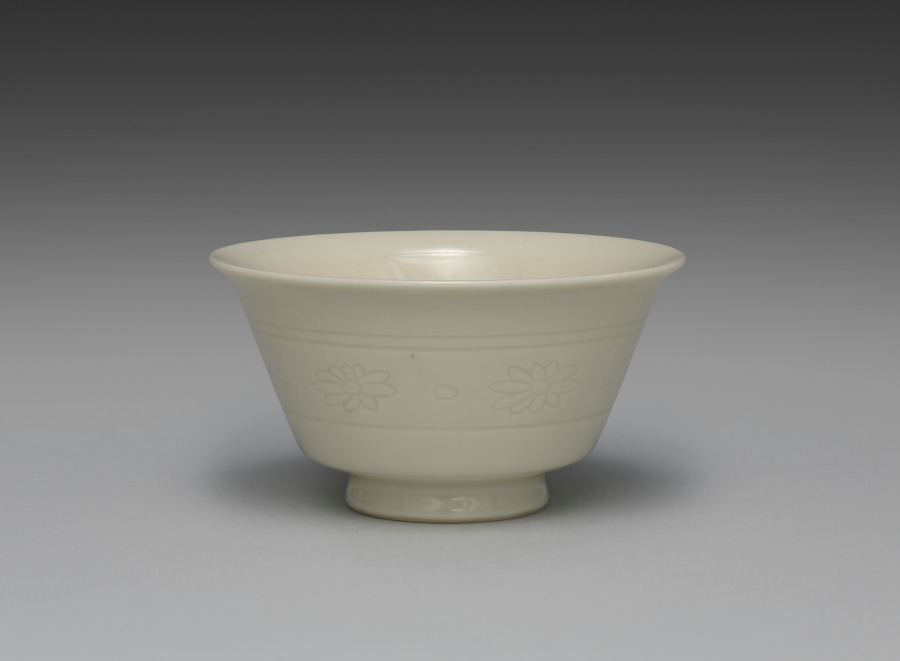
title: Teacup from Teacups with Floral Band Motif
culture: Japan, Meiji period (1868–1912)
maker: Seifū Yohei III (Japanese, 1851–1914)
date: 1893–1914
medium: One from a set of five cups; porcelain with incised decoration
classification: Ceramic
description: The five sencha teacups in this set are decorated with incised flowers and dots between a double band at the top and a single band at the bottom. They are in Yohei III’s creamy taihakuji body and glaze. In their motifs, they are quite similar to an incense burner by Yohei III (see CMA 2022.180), but the flowers are even more simple in design, with no open circle at the center. A label affixed to the side of the box refers to them as “sencha cups in emulation of Korean white [ware].” The reference to Korean ware indicates that even though Yohei was more directly inspired by Qing-dynasty wares from the Dehua kilns in Fujian Province in developing his porcelain clay and glaze for works such as these, the general understanding of the continental models still placed them, at least in terms of color, among pieces broadly associated in Japan with Korean white wares. The delicate cups are thinly potted, so they have a highly desirable translucency.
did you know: The delicate cups in this set are thinly potted, so they have a highly desirable translucency.